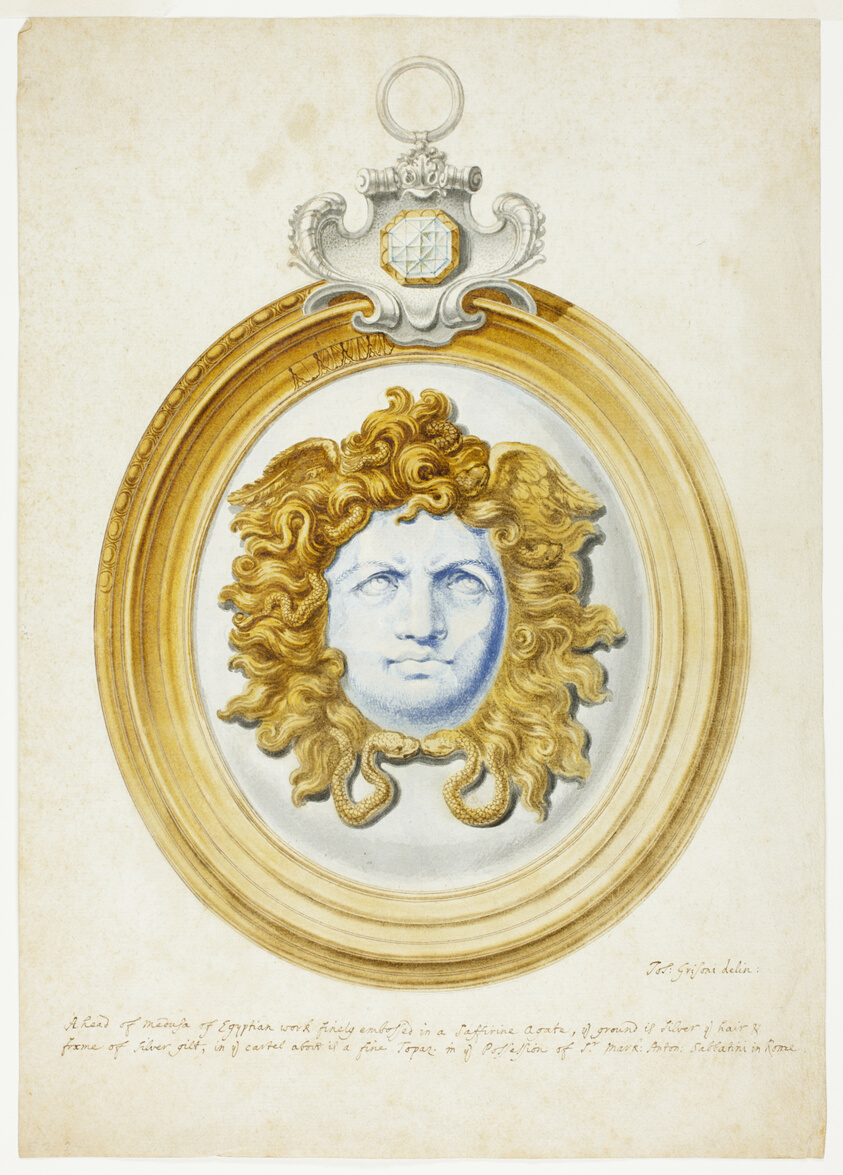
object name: Drawing and Watercolor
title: Head of Medusa (Sabbatini collection, Rome)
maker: Giuseppe Grisoni (Italian, born Flanders, 1699-1769)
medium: Gouache with pen and brown ink, over black chalk, on ivory laid paper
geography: Flanders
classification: gouache; watercolor; drawings (visual works); prints and drawing